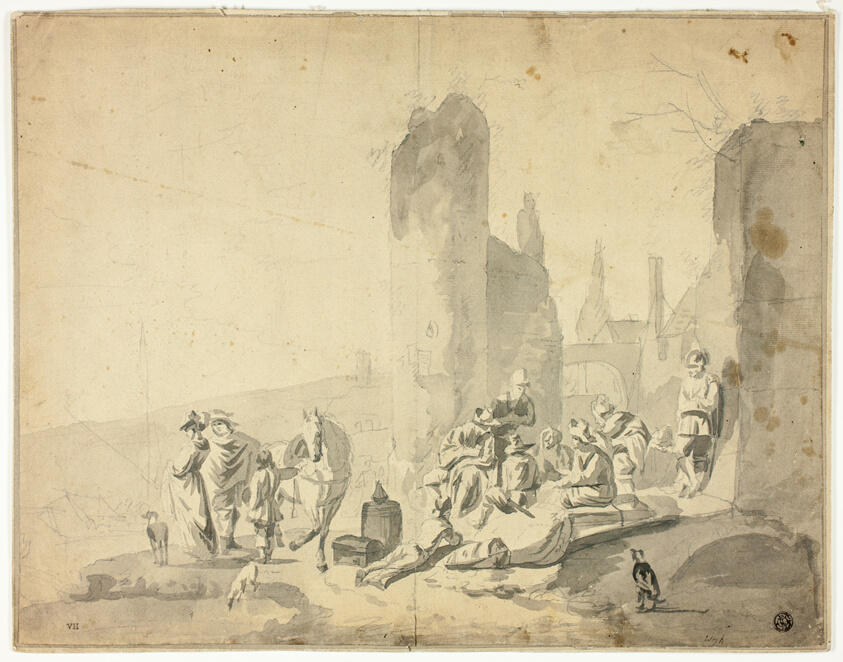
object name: Drawing and Watercolor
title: Harborside Scene with Various Figures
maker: Hendrik Verschuring (Dutch, 1627-1690); or Thomas Wyck (Dutch, 1616-1677); or Nicolaes Berchem the Elder (Dutch, 1621/22-1683)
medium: Graphite, with brush and gray wash, on tan laid paper, laid down on card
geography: Netherlands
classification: ink or chalk wash; drawings (visual works); prints and drawing